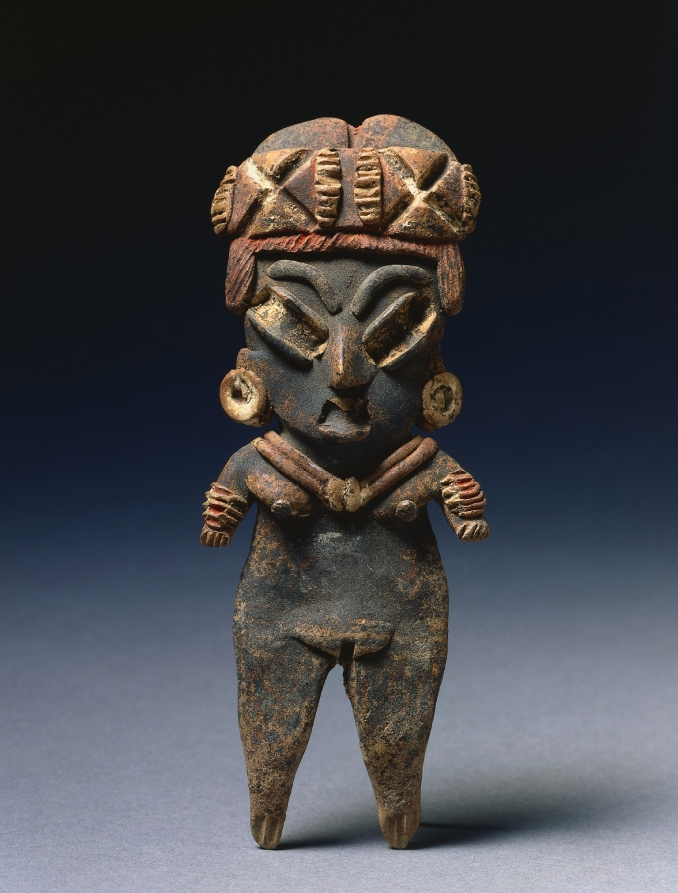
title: Archaic Figurine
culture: Mesoamerica, Mexico, Guanajuato, Chupícuaro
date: 400–100 BCE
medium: earthenware with pigments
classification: Ceramic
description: Burials from ancient villages near Chupicuaro, Guanajuato contain hundreds of pottery offerings. These include brightly colored vessels and solid figurines decorated with appliqué and incision. The cheerful, informal figurines were probably intended to provide the dead with companionship, and to remind them of their loved ones.